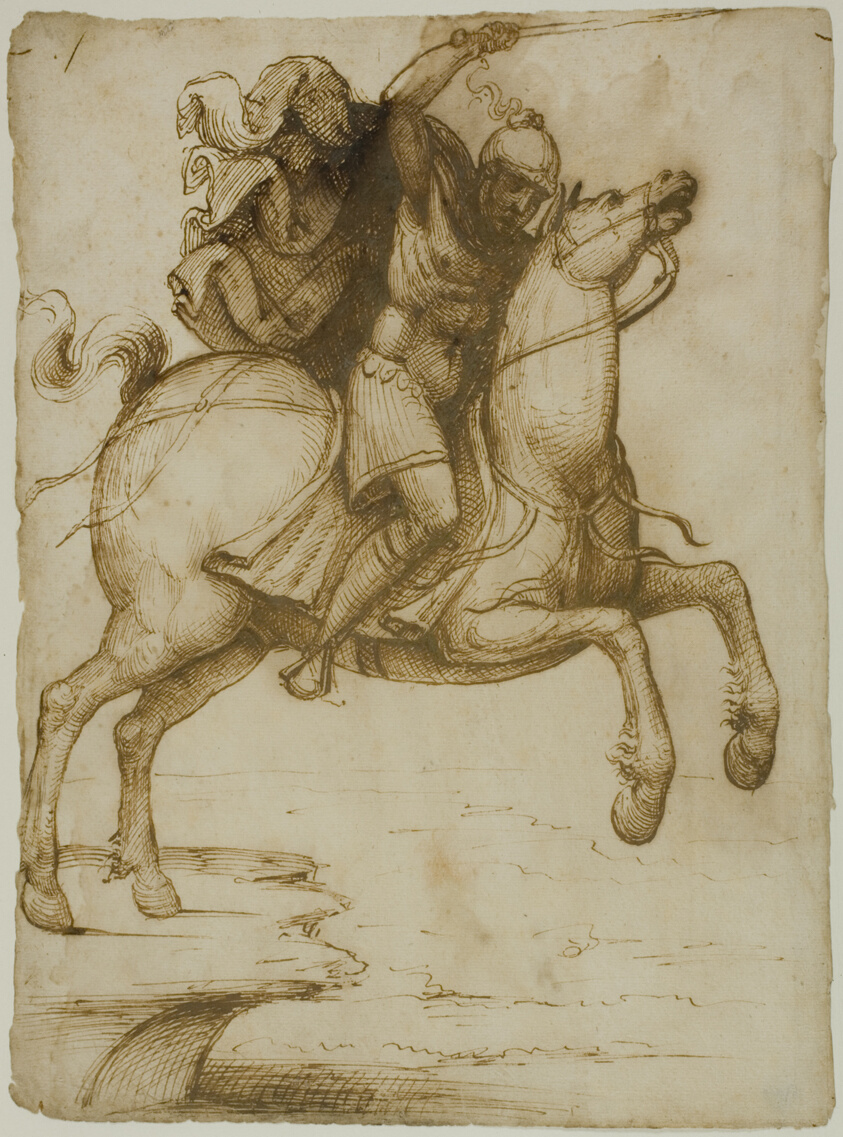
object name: Drawing and Watercolor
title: Marcus Curtius Leaping into the Abyss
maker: Pseudo-Pacchia (Italian, active c. 1530)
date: c. 1530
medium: Pen and brown ink on cream laid paper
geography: Italy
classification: pen and ink drawings; drawings (visual works); prints and drawing